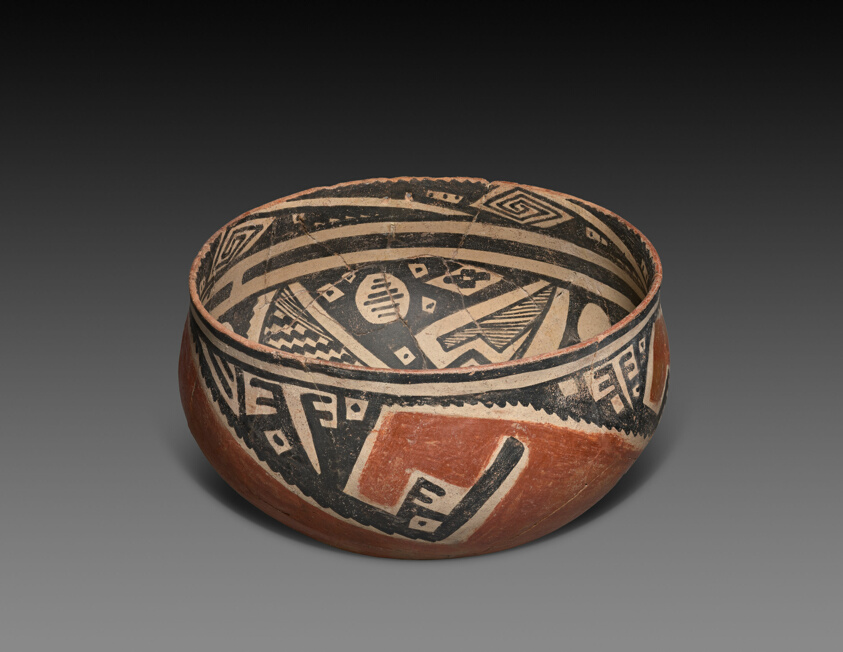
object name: Vessel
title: Bowl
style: cibola, americas, southwest, roosevelt, tonto, native american, native north american, Arts of the Americas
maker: Roosevelt Redware, Cliff Polychrome, Tonto variety; Cibola region, east-central Arizona, United States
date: 1360–1450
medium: Ceramic and pigment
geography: Arizona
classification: bowl; earthenware; ceramics; vessel; art of the americas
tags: geometric, servingware